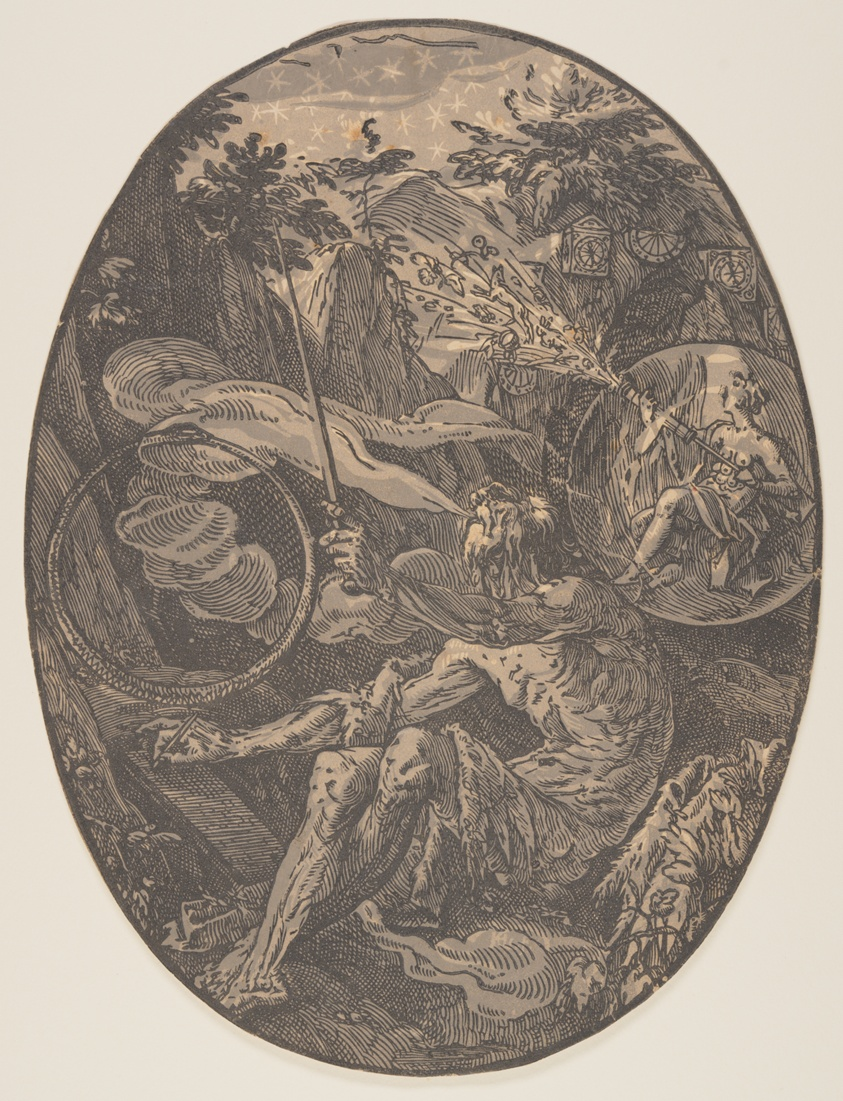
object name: Print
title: Demogorgon in the Cave of Eternity, from The Deities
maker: Hendrick Goltzius (Dutch, 1558–1617)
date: 1588/90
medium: Chiaroscuro woodcut from three blocks in tones of gray on ivory laid paper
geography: Netherlands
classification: print; paper; prints and drawing; woodcut